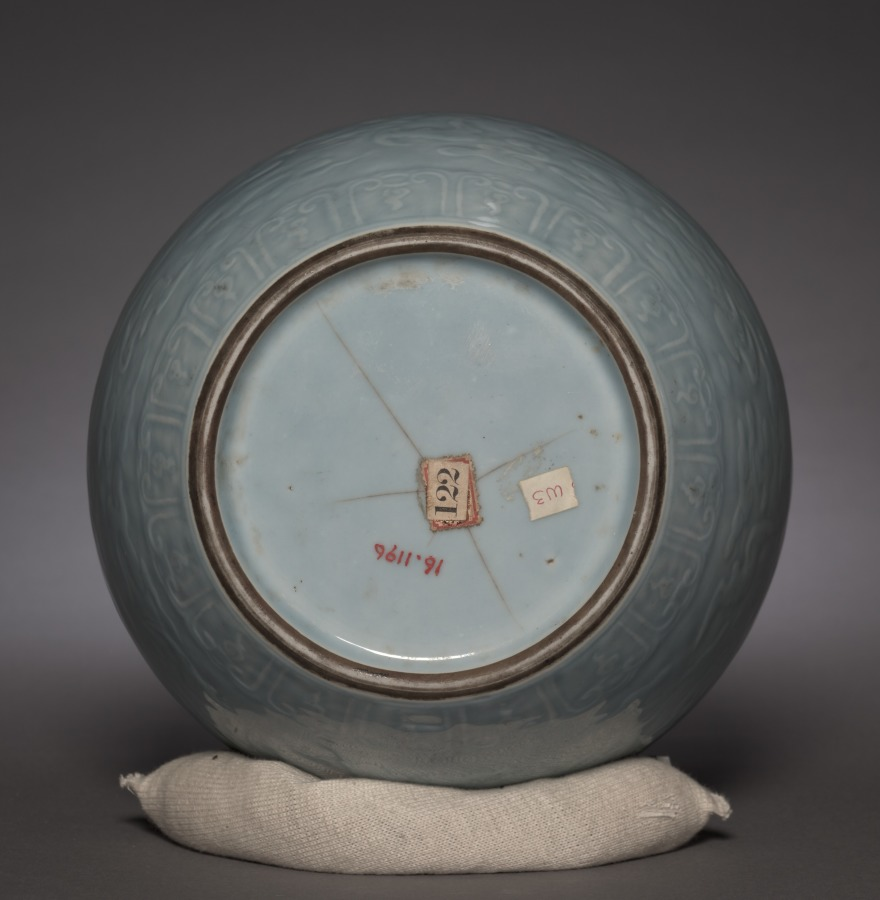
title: Jar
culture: China, Qing dynasty (1644–1911), Qianlong reign (1736–95)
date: 1736–95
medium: porcelain with molded decoration and blue glaze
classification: Ceramic